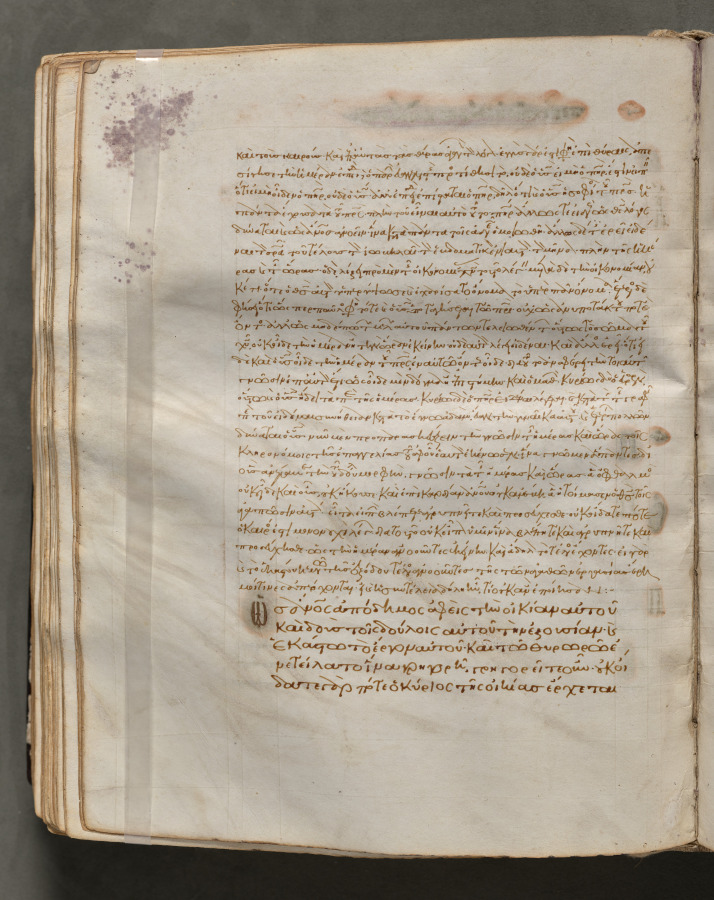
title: Text, folio 185 (verso), from a Gospel Book with Commentaries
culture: Byzantium, Constantinople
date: c. 1000–1100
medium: ink, tempera, and gold on vellum; leather binding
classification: Bound Volume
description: Each of the four gospels in this book opens on a page with brilliantly illuminated borders depicting the author of the text as well as birds-principally peacocks, symbols of the immortality of the soul-and fountains, representing the fountain of life and the salvation of the soul. This volume consists of 428 leaves with texts in Greek. Its level of sophistication suggests that it was probably written and decorated in a monastery in Constantinople.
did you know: Gospel Books were carried in procession through Byzantine churches.